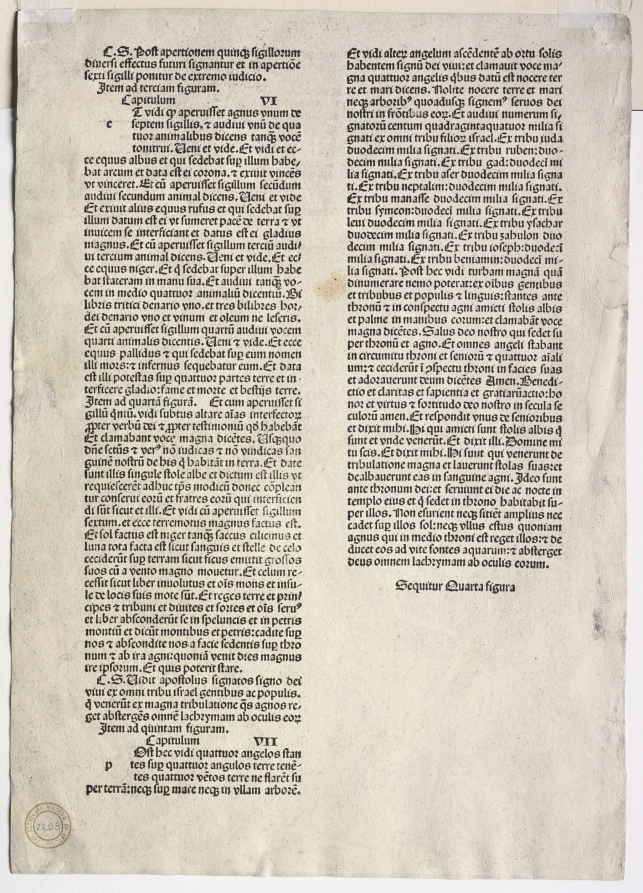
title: Revelation of St. John: The Four Horsemen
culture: Germany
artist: Albrecht Dürer (German, 1471–1528)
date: 1511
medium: woodcut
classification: Print